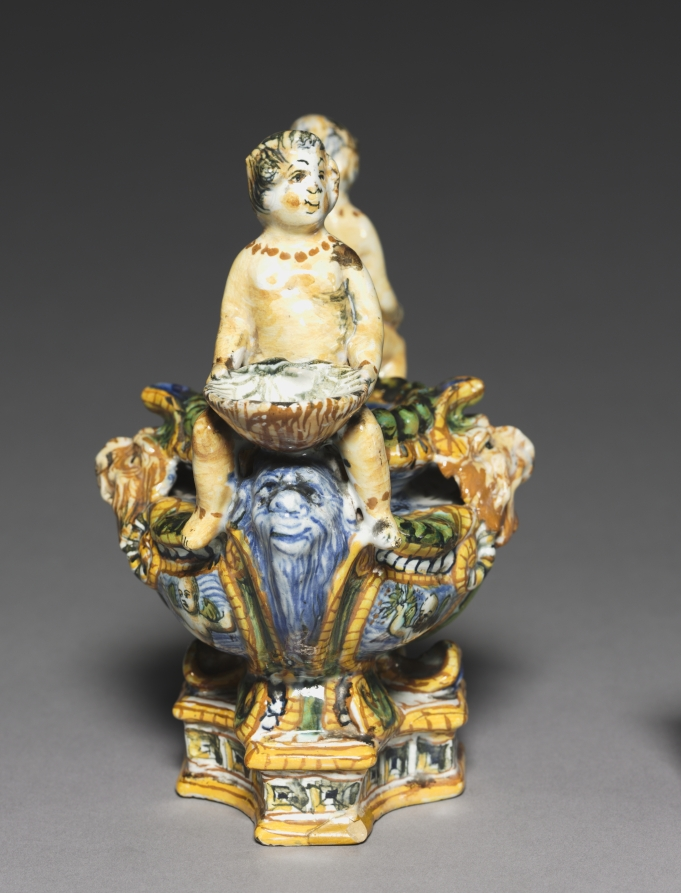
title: Saltcellar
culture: Italy, Urbino, 16th century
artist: circle of the Patanazzi Family (Italian)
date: c. 1570–90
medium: tin-glazed earthenware (maiolica)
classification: Ceramic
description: During the Italian Renaissance of the 1400s and 1500s, nobles and merchants eager to express their wealth and sophistication ordered ceramics for dining, display, and storage. Known as maiolica, because it resembled the brightly colored ceramics from the Mediterranean island of Majorca, these ceramic vessels were covered with a tin glaze that provided an opaque white surface on which colorful decoration could be painted.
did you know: During the Renaissance, salt was an expensive commodity and was used to both season and preserve food.